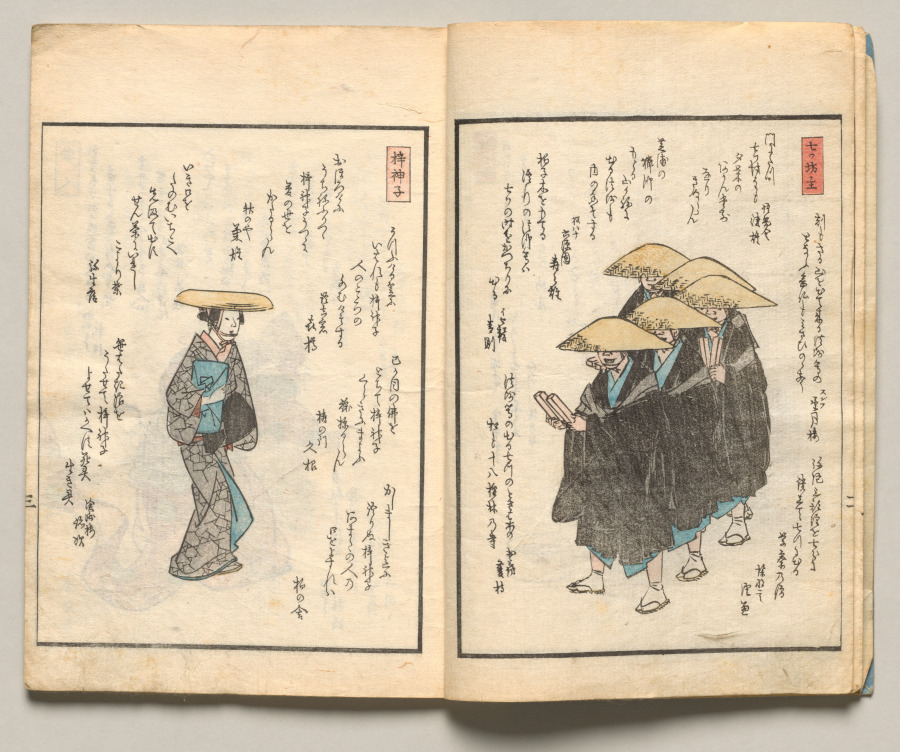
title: Spread Three from Volume Three of People of Japan in Light Verse (Kyōka)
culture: Japan, Edo period (1615–1868)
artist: Utagawa Hiroshige (Japanese, 1797–1858)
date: 1857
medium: Woodblock-printed book; ink and color on paper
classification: Bound Volume